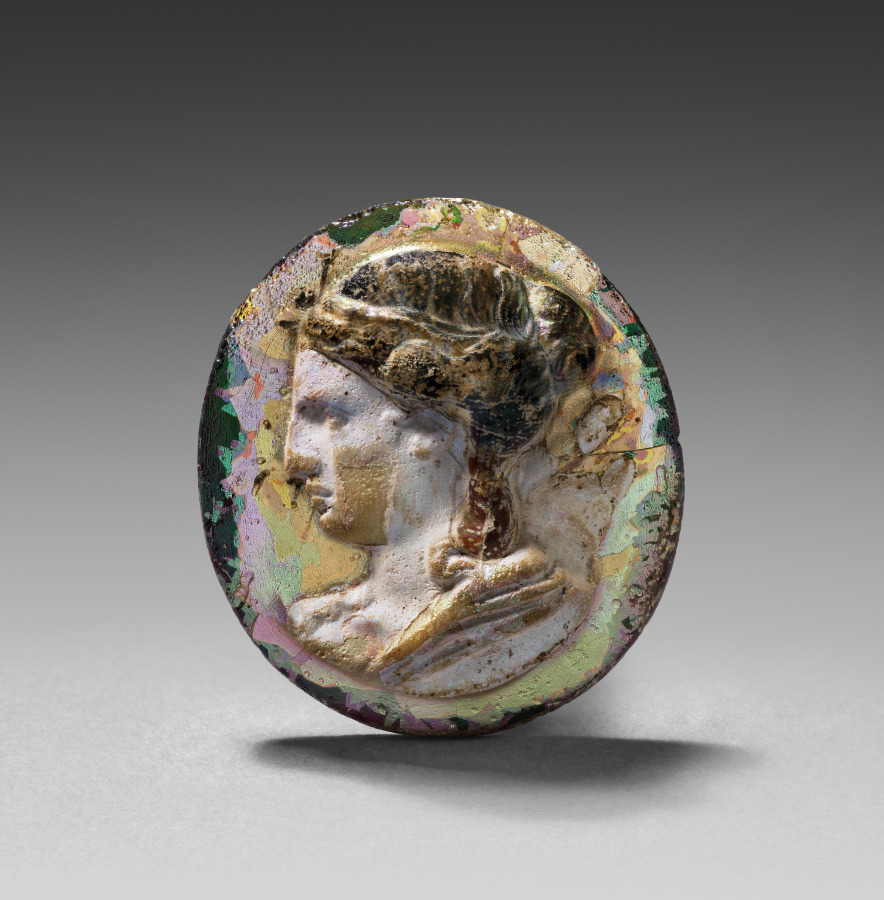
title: Cameo: Head of Diana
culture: Italy, Roman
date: 25 BCE - 100 CE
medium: glass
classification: Glass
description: This cameo depicts the Roman Goddess of the Hunt, Diana, known as Artemis to the Greeks. She faces left with her hair bound at the back of her head, her signature quiver of arrows visible over her shoulder. Roman cameo glass was made by fusing layers of different colored glass on top of one another, then carving down to reveal each different color. There are at least four layers of glass in this cameo: a dark layer for the hair, a whitish layer for the skin, middle tone for the background, and a dark purple for the base.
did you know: Ancient glass did not glitter; the iridescent film on this cameo developed over thousands of years.